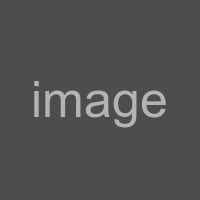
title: Gwalior. Urwai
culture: India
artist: Photoglob Co. (Zurich, active c. 1890–1910)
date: 1890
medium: Photochrom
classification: Photograph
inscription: Imprinted in gold on recto in lower left corner: “20020. P.Z.-GWALIOR. URWAI”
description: The sculptures were carved into the steep sides of the cliffs below Gwalior’s fort in the mid-1400s, but the faces were re-cut after the images were defaced in 1527. The tiny visitors depicted on the road emphasize their monumental scale. The colors in this image are imagined, added later in the studio in a lithographic printing process that produces colorized ink-on-paper prints from black-and-white photographic negatives.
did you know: These sculptures depict Jinas, who are venerated by followers of the Jain religion of India, one of the oldest religions in the world.